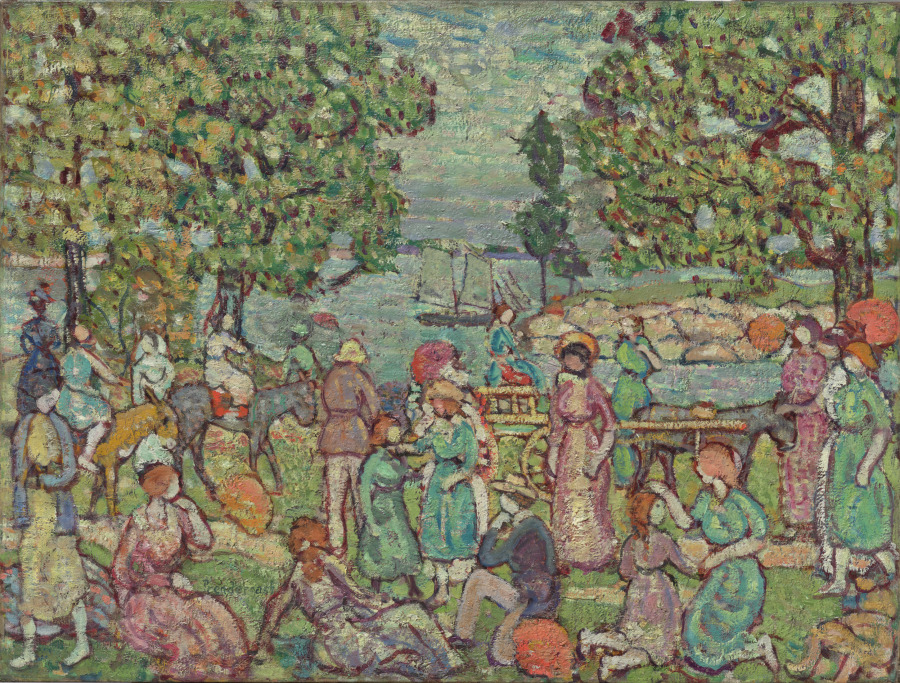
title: On the Beach, No. 3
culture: America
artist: Maurice Prendergast (American, born Newfoundland [now Canada], 1858–1924)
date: c. 1915–18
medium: oil on canvas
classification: Painting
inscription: signed lower left: Prendergast; annotated on verso, "The Beach."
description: Prendergast developed a distinctive painting style featuring rounded patches of thickly applied color. Like many of his works, On the Beach, No. 3 visually approximates a densely woven tapestry.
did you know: Three modes of transportation appear in this composition: a ship, horse, and donkey cart.